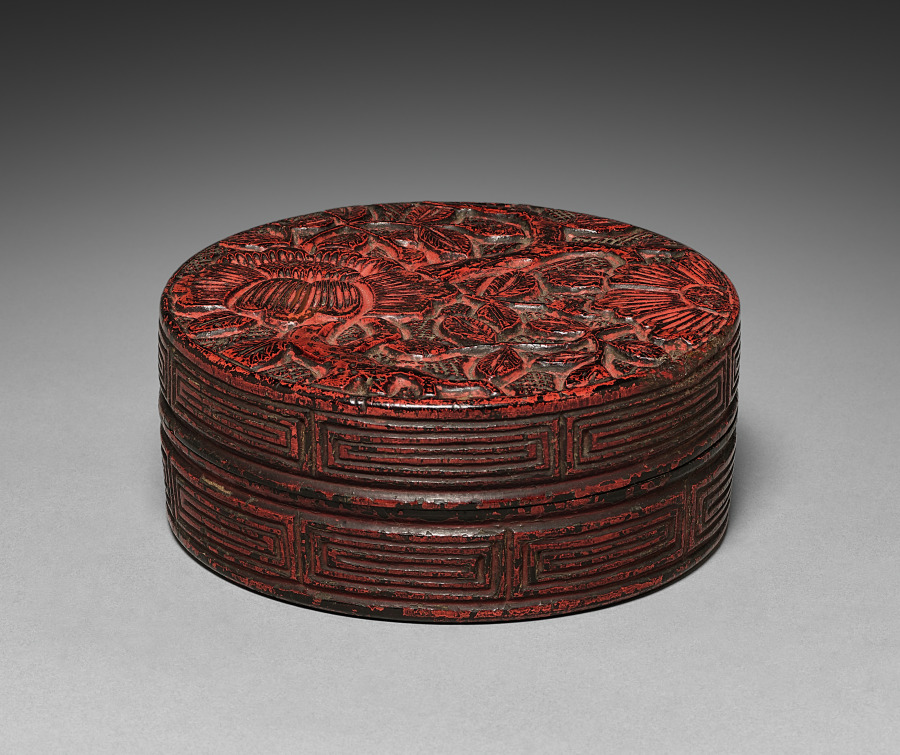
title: Incense Box (Kogo) with Camellia Design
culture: Japan, Muromachi period (1392–1573)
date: 1500s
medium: carved wood with black and red lacquer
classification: Lacquer